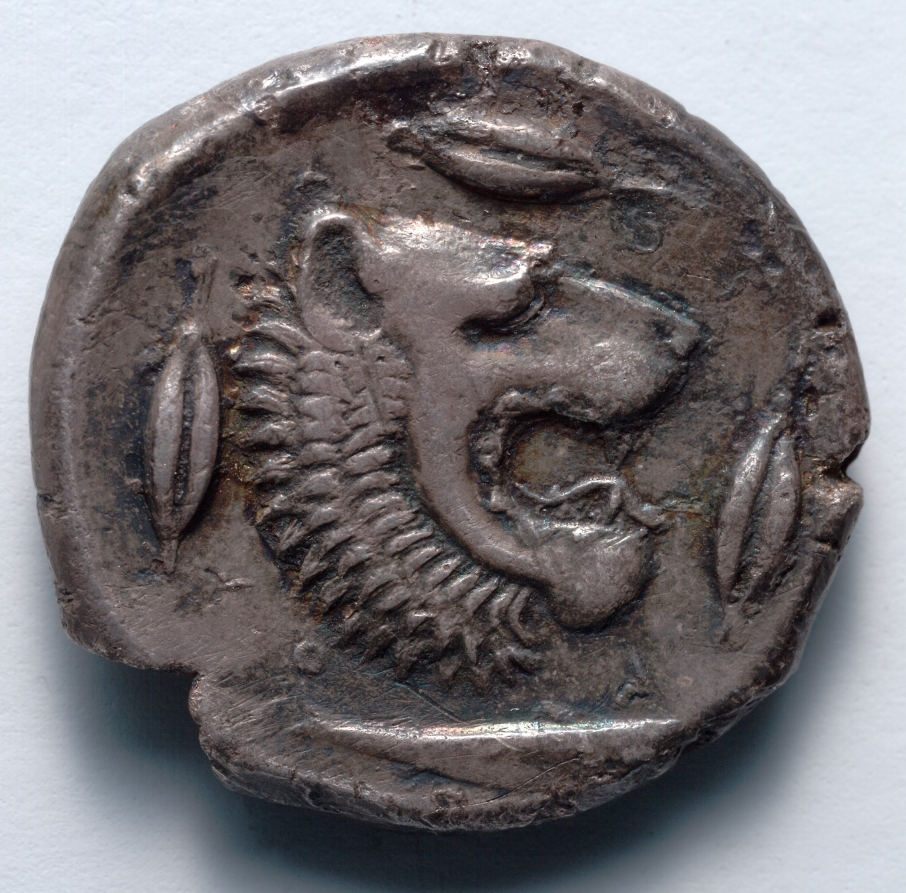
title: Tetradrachm: Head of Lion, Barley, Riverfish (reverse)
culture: Greek, minted at Leontinoi (Sicily)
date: 466–422 BCE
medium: silver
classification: Coins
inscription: [ΛΕ]Ο[ΝΤ]ΙΝΟΝ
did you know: The lion on coins of Leontini marks a pun on the city name.